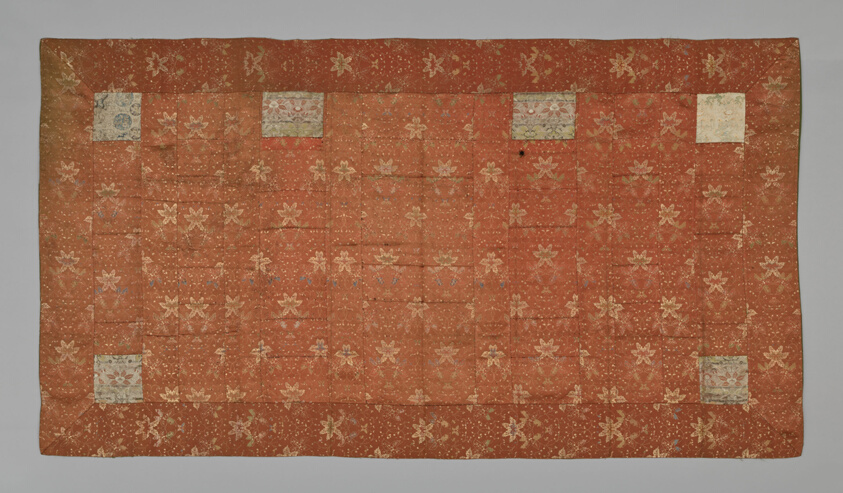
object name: Textile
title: Kesa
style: edo (japanese period), late edo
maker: Japan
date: late Edo period (1789–1868), early 19th century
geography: Japan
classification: textile; weaving; liturgical - buddhist; costume